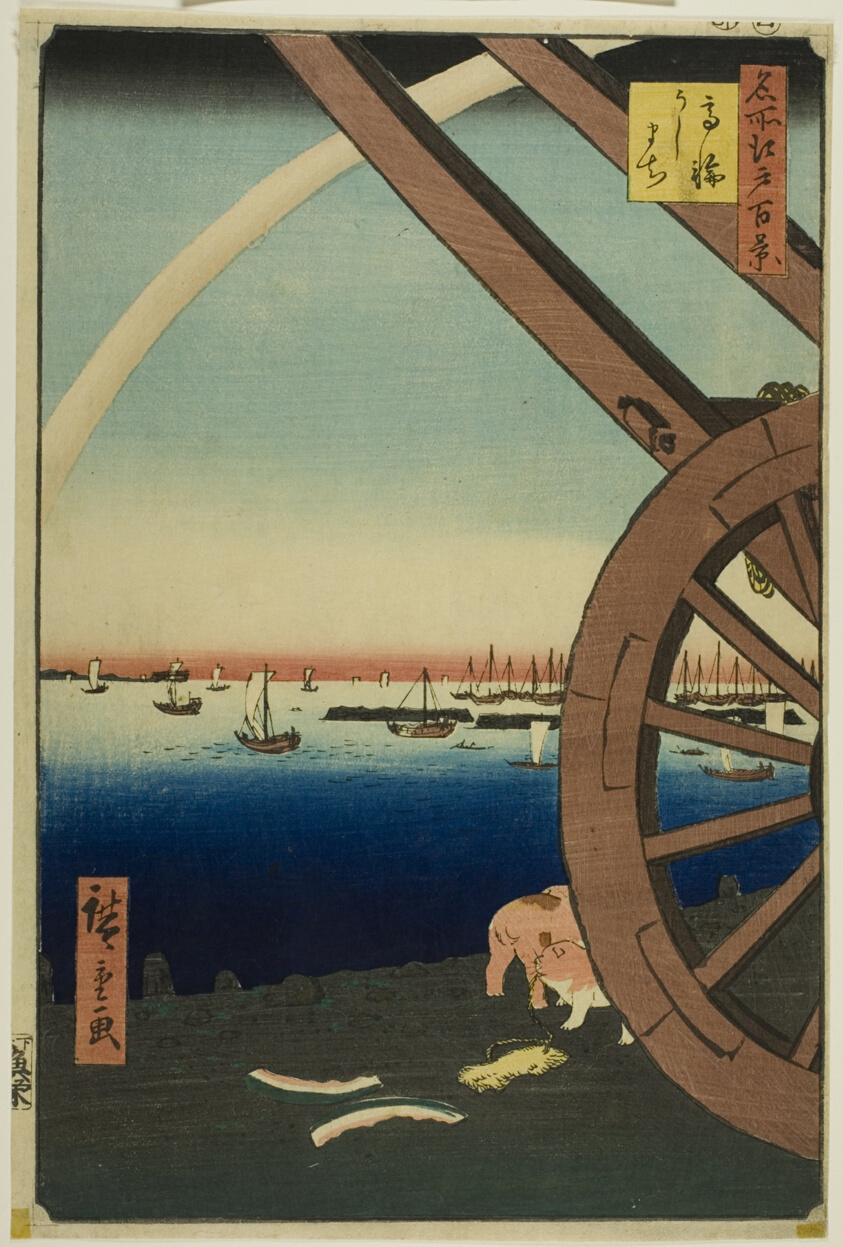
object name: Print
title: Ushimachi at Takanawa (Takanawa Ushimachi), from the series "One Hundred Famous Views of Edo (Meisho Edo hyakkei)"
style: Japanese (culture or style)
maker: Utagawa Hiroshige 歌川 広重; Japanese, 1797–1858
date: 1857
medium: Color woodblock print; oban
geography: Japan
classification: woodblock print; print